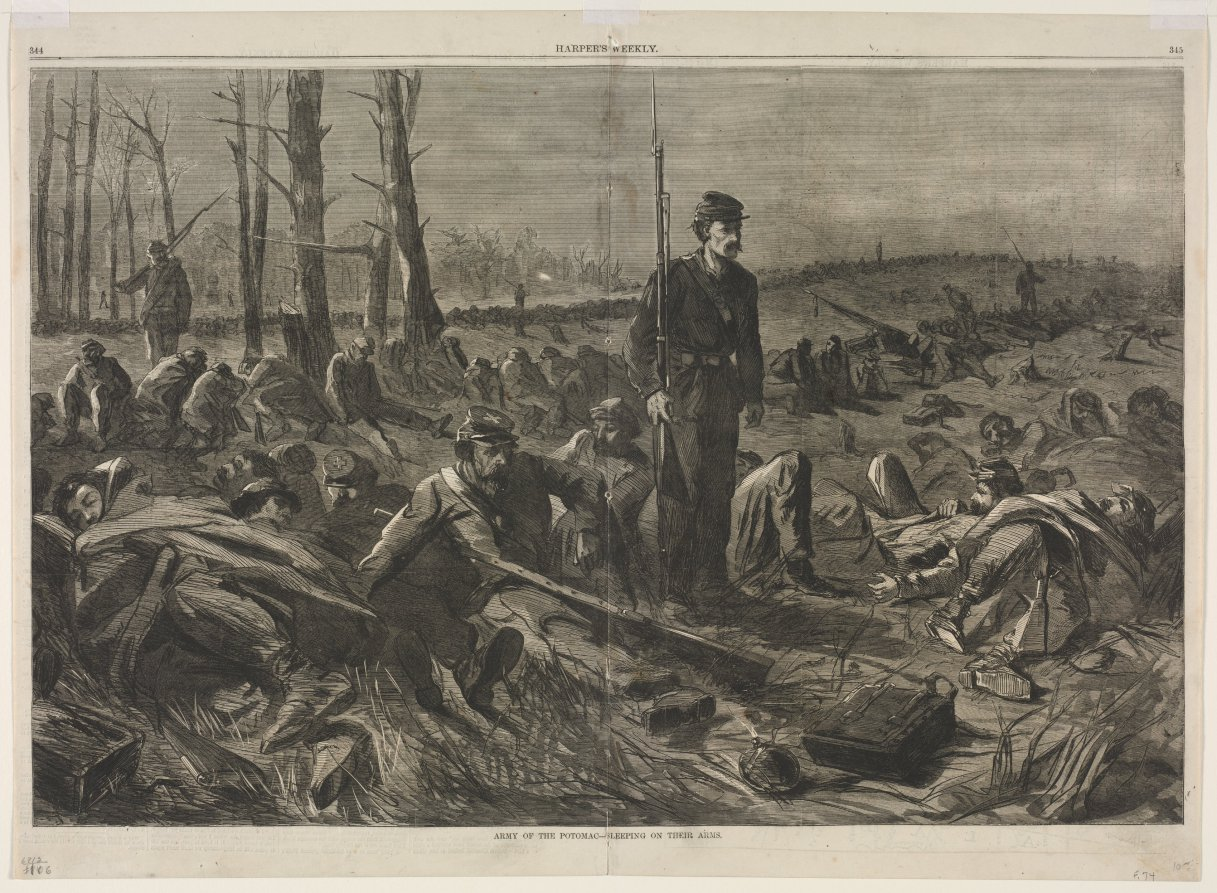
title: Army of othe Potomac - Sleeping on Their Arms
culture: America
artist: Winslow Homer (American, 1836–1910)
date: 1864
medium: wood engraving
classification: Print